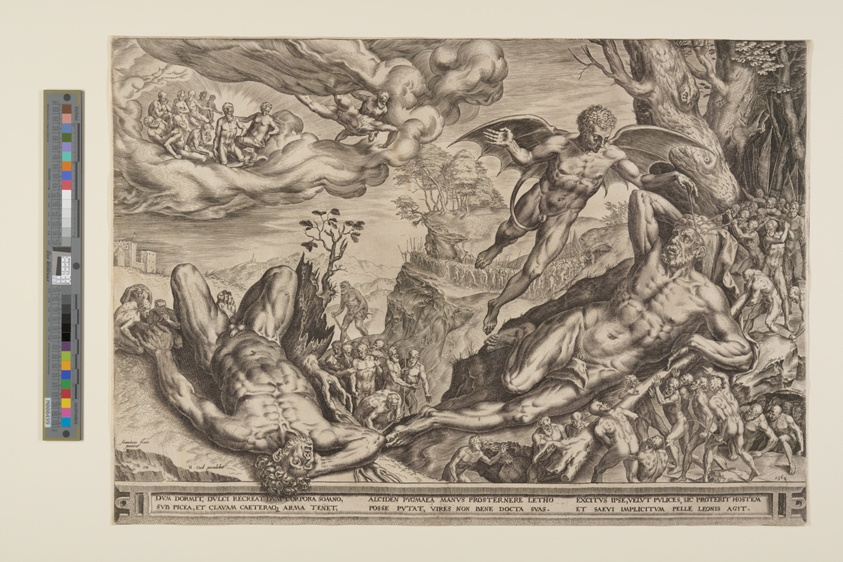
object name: Print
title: Hercules besieged by Pygmies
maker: Cornelis Cort (Netherlandish, 1533–before 1578); after Frans Floris I (Netherlandish, 1519/20–1570)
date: 1562-63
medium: Engraving on ivory laid paper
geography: Netherlands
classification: engraving; paper; print; prints and drawing